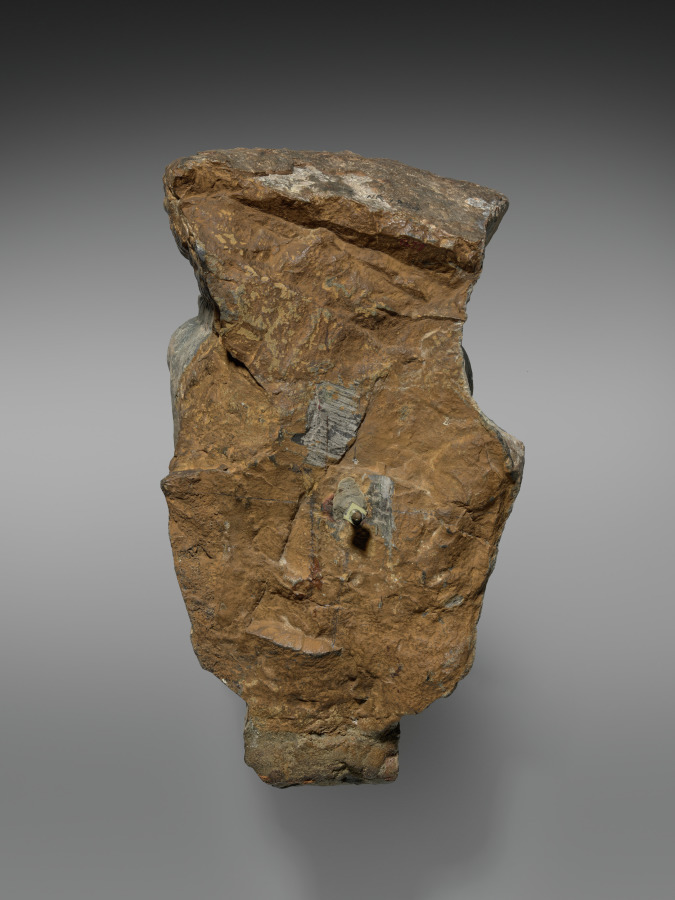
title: Head of Bodhisattva Guanyin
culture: China, Six Dynasties period (317-581), Northern Wei dynasty (386-534)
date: c. 510–520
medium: stone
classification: Sculpture